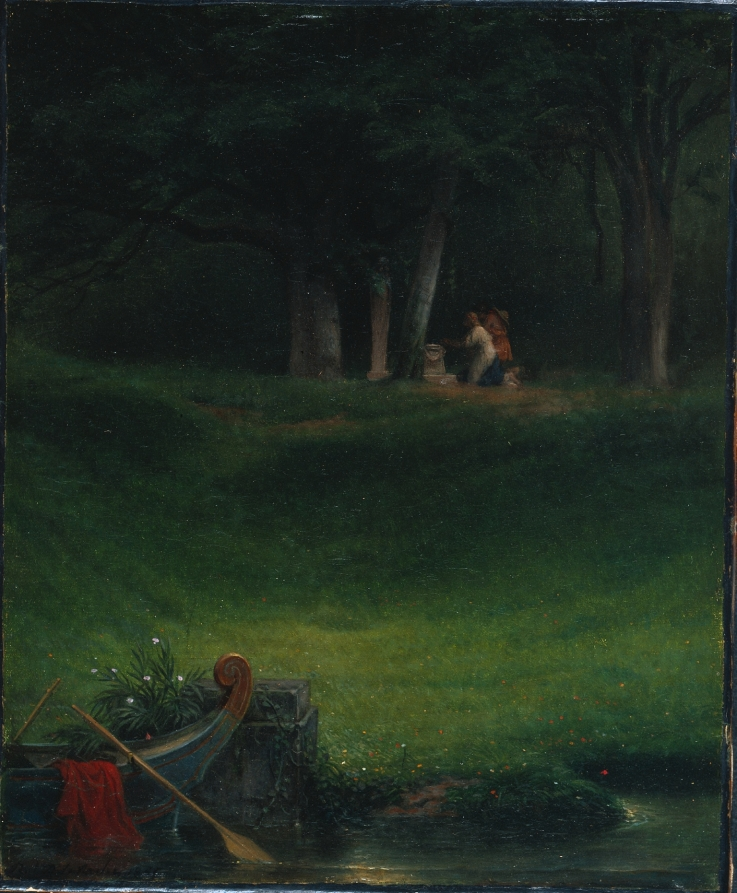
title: Offering to the God Pan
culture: France, 19th century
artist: Paul Delaroche (French, 1797–1856)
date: 1855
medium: oil on fabric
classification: Painting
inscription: Signed lower left: Paul DelaRoche 1855